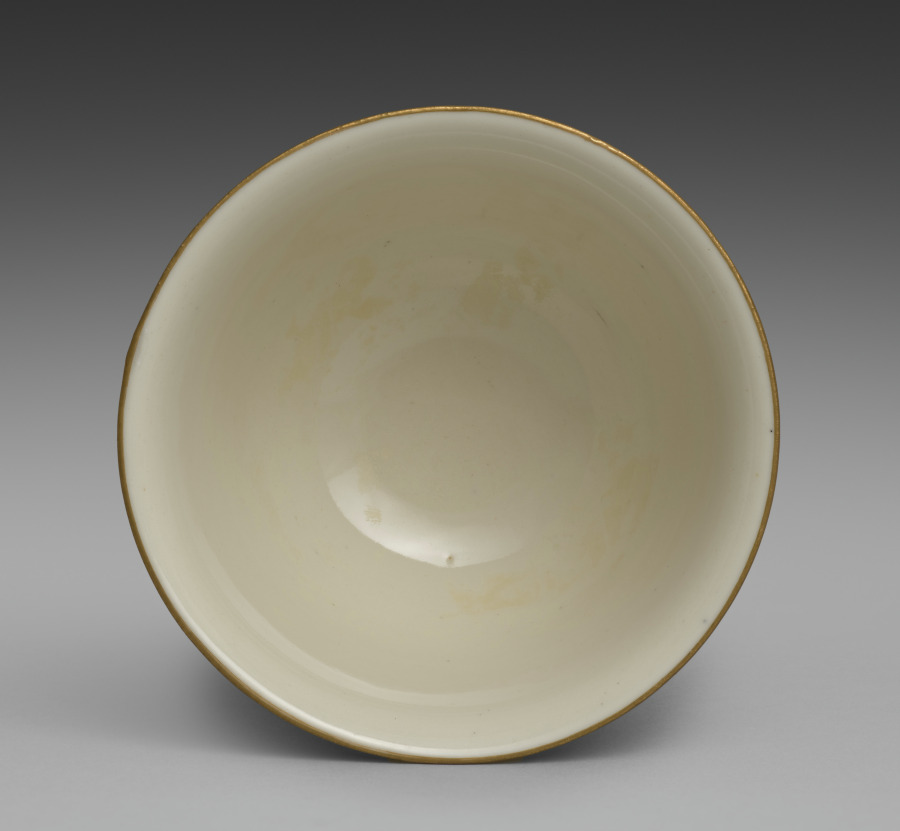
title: Drinking Cup from Dining Set with Plum Blossoms and Cracked-Ice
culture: Japan, Meiji period (1868–1912)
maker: Seifū Yohei II (Japanese, 1844–1878)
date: c. 1875–78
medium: Porcelain with molded designs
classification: Ceramic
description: Each item in this set has a delicate low-relief design of flowering plum branches over scattered, intersecting lines meant to resemble the cracked-ice surface of a frozen body of water and is signed on the base in gold pigment. While Yohei II produced many fine works in underglaze blue, like those produced by Kiyomizu Shichibei, he also made works in quite different styles later in his career, from the early 1870 s. In 1873, he was appointed purveyor to the Industrial Center of Kyoto Prefecture, a designation associated with Kyoto’s efforts to reach an international market through the port of Kobe; and from 1875 until his death, he was involved in national-level projects to present Japanese ceramics across the world. It was during this period that Yohei III was apprenticed to Yohei II, and it has been suggested that this set may in fact be an early example of Yohei III’s work, which he signed with his teacher’s name. Decorated with flowers resembling Japanese textile motifs, the set calls to mind the design of Yohei II’s pair of vases with plum blossoms in the Victoria and Albert Museum. Here, the elaborate trees created for a formal public exhibition setting have been translated into the approachable blossoms of the genteel domestic environment. While the designs are consistent across the pieces, each raised flower petal and pistil and each incised line in the ice was done by hand, so the cups, bowls, and dishes are similar yet unique. The bottoms of two boxes once identified the set’s owner, but the information has been deliberately obscured with black ink. However, inscriptions still visible appear to indicate two occasions, once at the end of July 1886 , and once again in June 1916 , when parts of the set were requested from Hokura in Niigata Prefecture. The location corresponds to a neighborhood in the present-day city of Jōetsu. The surname Tsuji 辻 also appears on a paper tag affixed to one of the box cloths. Future research may possibly reveal more about their provenance. A vase by Yohei III in a private collection combines the formal grandeur of the Yohei II vases in the Victoria and Albert Museum with the gentler design of this dining set, placing flowering plum trees against soft, scalloped-edge clouds resembling those in golden screens.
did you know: The dining wares have a creamy white coloration that the four boxes containing them identify as Korean in style.